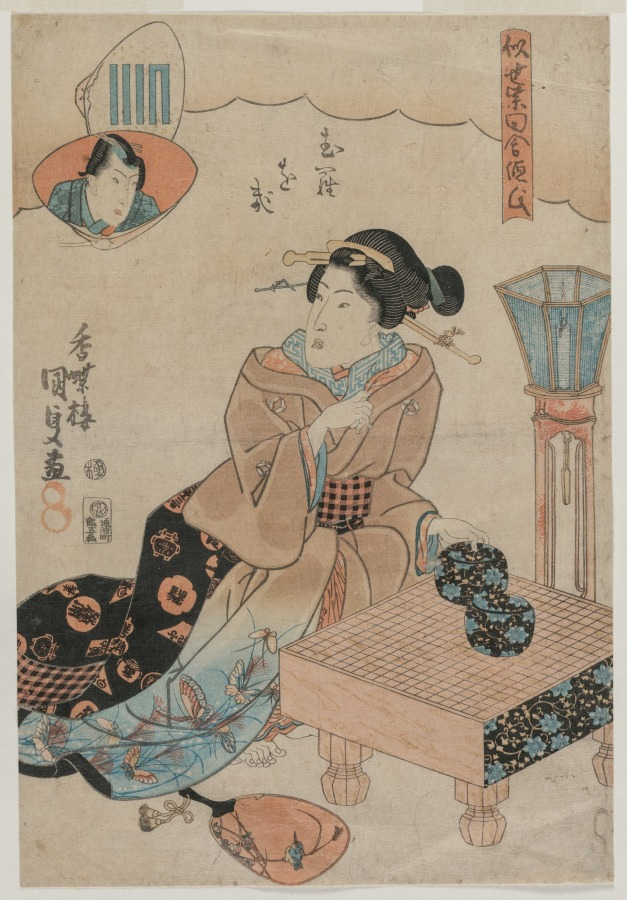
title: Muraogi, from the series The False Murasaki's Rustic Genji (Nise Murasaki Inaka Genji)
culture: Japan, Edo period (1615–1868)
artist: Utagawa Kunisada (Japanese, 1786–1865)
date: 1830s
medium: color woodblock print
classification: Print